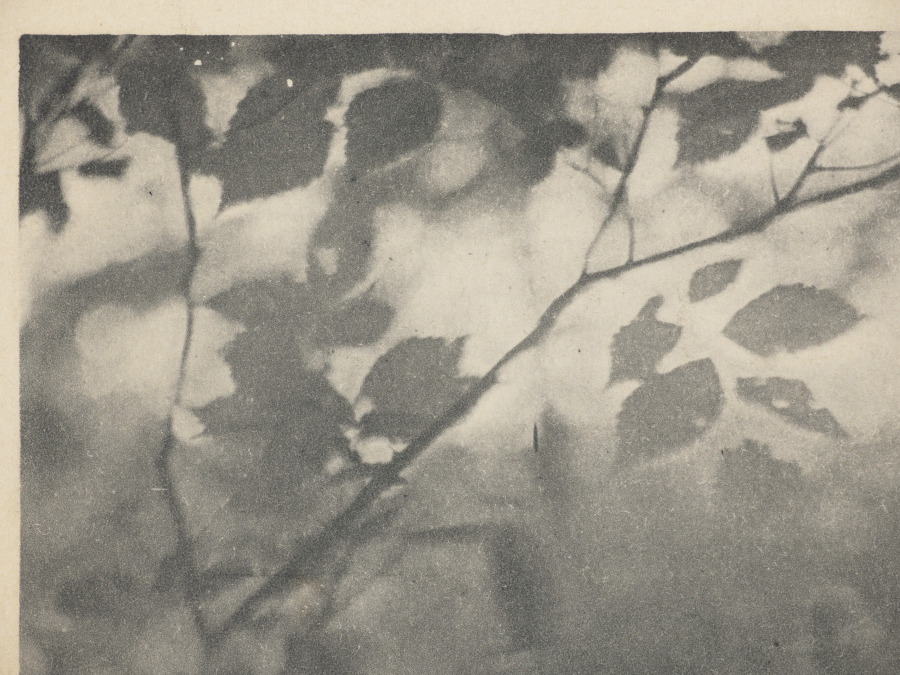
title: The Edge of the Wood - Evening (Letitia Felix)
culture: America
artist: Clarence H. White (American, 1871–1925)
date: 1900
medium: photogravure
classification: Photograph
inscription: Written in pencil on recto: "Clarence H. White [signed] '00"; in pencil on verso: " 'The Edge of the Wood-Evening'- / Clarence H. White"; in pen on verso: "Letitia Felix"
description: Clarence H. White experimented with an array of artistic media that blurred the lines between photography, drawing, and printmaking. Here are two examples of that experimentation: a platinum print on the left and a photogravure on the right. White was likely drawn to both processes for their broad tonal range and interaction of image and paper. To create platinum prints, a light-sensitive liquid emulsion is applied to and absorbed by the paper. The image forms within the paper’s fibers, resulting in a matte appearance. Because photogravures are printed like an etching, the image is formed with ink impressed onto the paper’s surface.